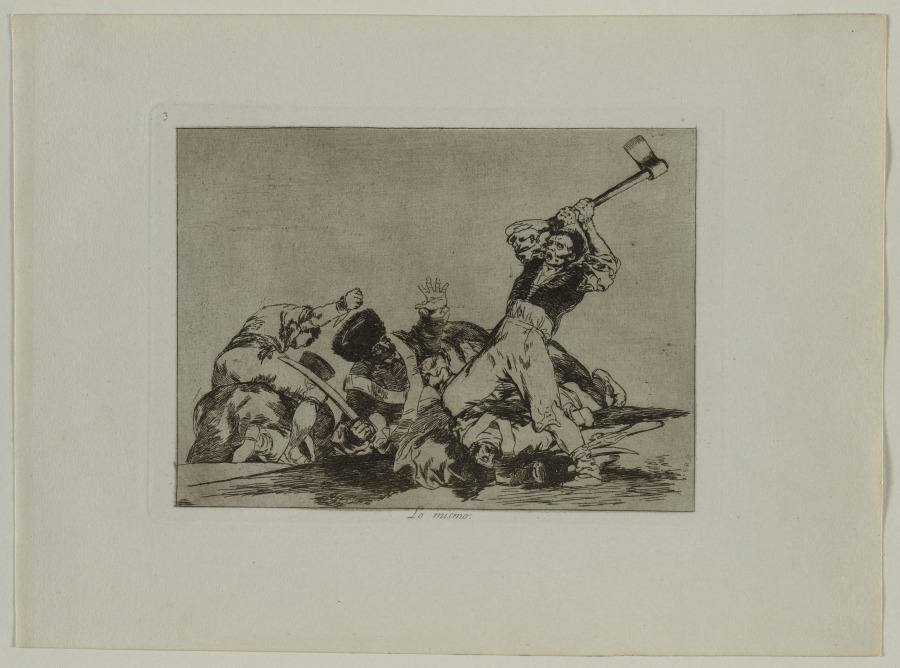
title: Disasters of War: Pl., 3, The Same (Thing)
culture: Spain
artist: Francisco de Goya (Spanish, 1746–1828)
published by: Real Academia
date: 1810–1813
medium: Etching and aquatint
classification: Print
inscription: In plate, below image, center: Lo mismo.; in plate, above image, upper left: 3; verso: lower right corner, in graphite: 01653G00002 and G-50 (upside down)